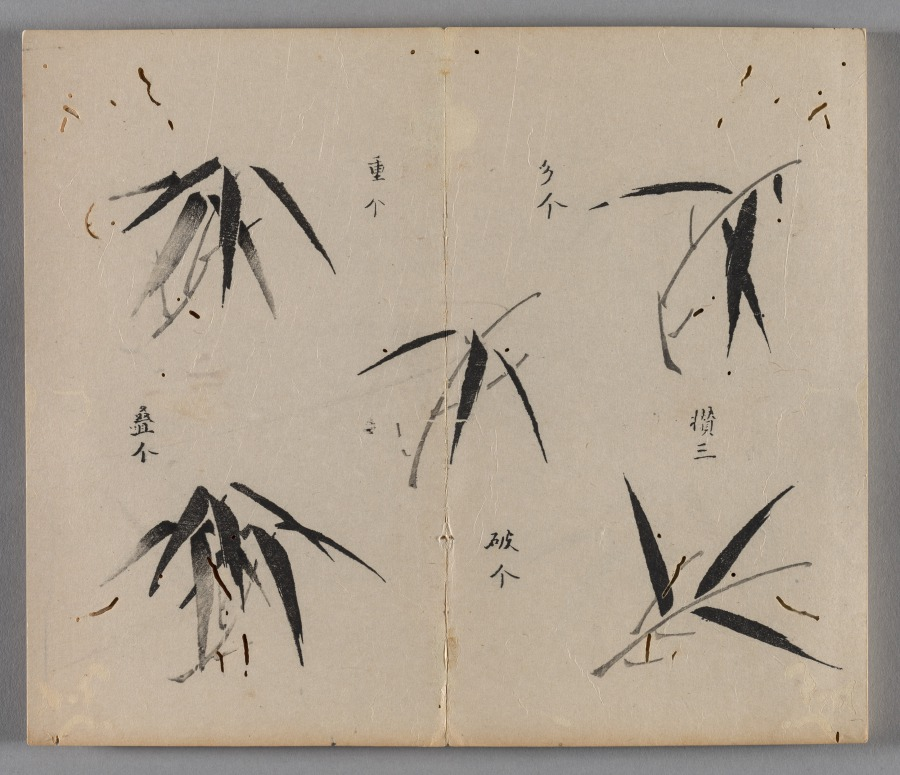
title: Ten Bamboo Studio Painting and Calligraphy Handbook (Shizhuzhai shuhua pu): Bamboo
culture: China, Qing dynasty (1644-1911)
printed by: Hu Zhengyan (Chinese, c. 1584–1674)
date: 1633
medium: Woodblock-printed book; ink and colors on paper; first edition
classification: Print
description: Color printing reached a level of perfection in the early 1600s, as seen in this Ten Bamboo Studio Collection of Calligraphy and Painting and the Mustard Seed Garden Manual of Painting (printed 1679 and 1701). The painterly quality, precision in registering (aligning) the woodblocks, and harmonious colors made them the most successful color print editions in Chinese history. Both editions were printed and compiled in Nanjing, spread nationwide, and had a great impact on the arts in Japan and Korea.